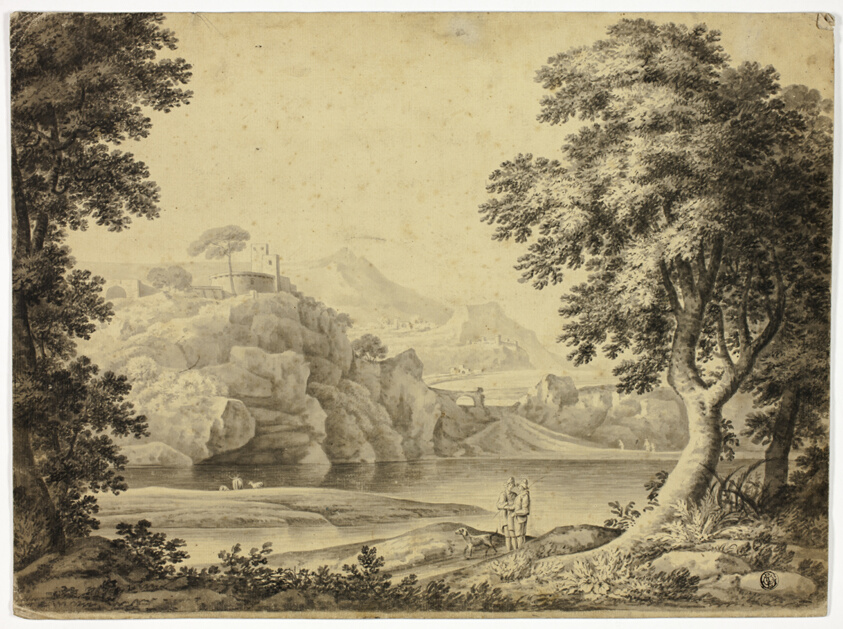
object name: Drawing and Watercolor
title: Italianate Landscape with Lake and Castle on Cliffs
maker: Harriette Anne Seymour (English, born 1830)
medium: Pen and black ink, with brush and black and gray wash, on cream laid paper, laid down on cream laid card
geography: England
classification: drawings (visual works); pen and ink drawings; paper; brush and wash; prints and drawing